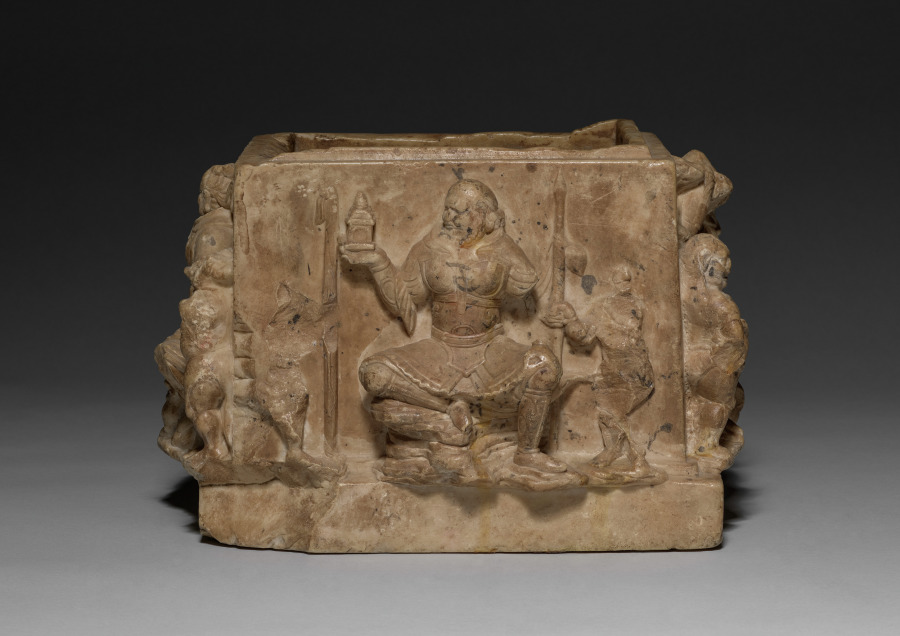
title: Square Urn with Celestial Guardians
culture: China, Tang dynasty (618–907)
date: 700s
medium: marble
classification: Sculpture